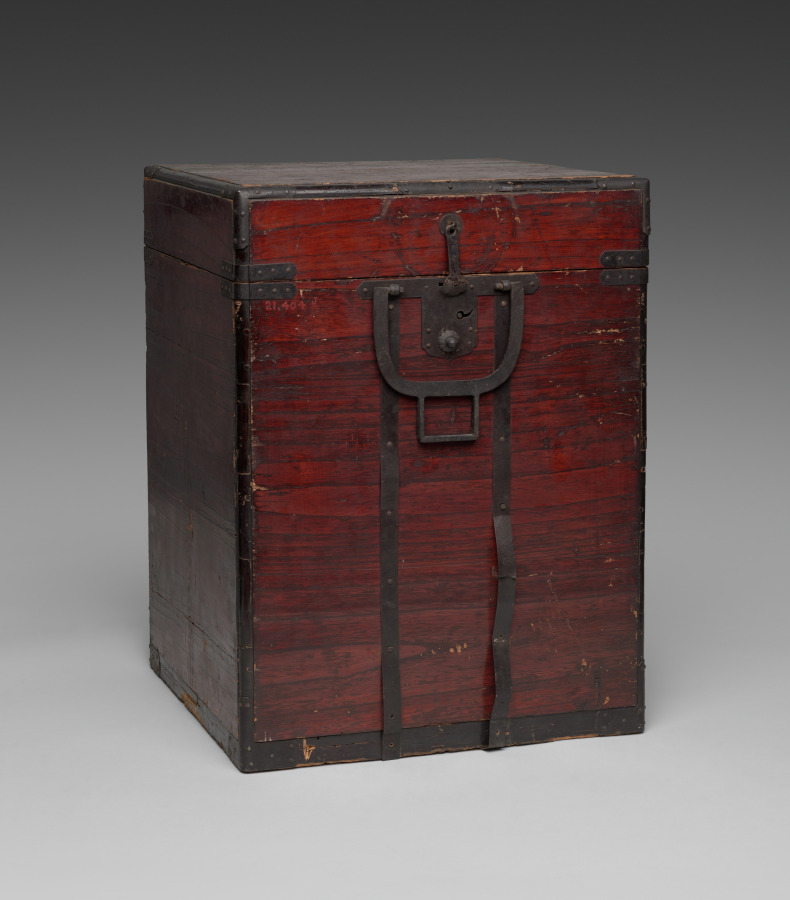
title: Suit of Armor (Gusoku-type)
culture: Japan, Edo period (1615–1868)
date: 1600s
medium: Iron, lacquer, textile (silk)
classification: Arms and Armor